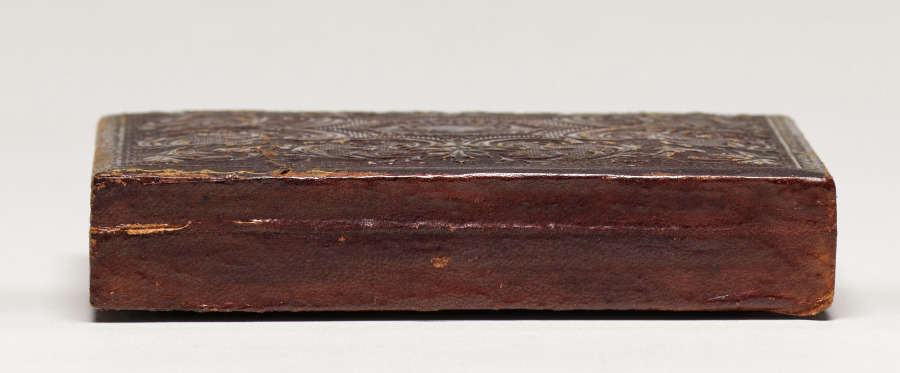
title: Post-Mortem on Pillow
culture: America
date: c. 1855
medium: ambrotype, tinted, sixth plate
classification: Photograph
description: Children have always been particularly cherished subjects for photography. Portraits were made to preserve the memory of their stages of growth and, in an age when long-distance travel was rare, to share with faraway relatives. And, for a sadder reason: in 1840 an estimated one-third of children died before age five. Photography offered grieving parents the opportunity to immortalize their children’s features. This tragic genre of photographs, later called “post-mortems,” often depicts the children in fine clothing, laying down with eyes shut, as if merely napping.